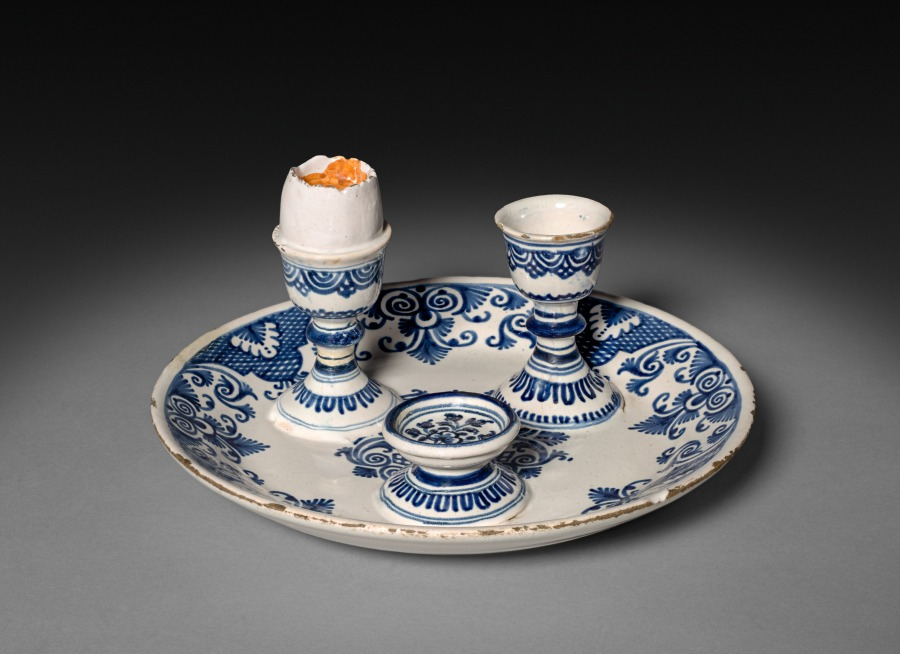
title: Plate with Boiled Egg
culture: France, 18th century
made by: possibly by Nevers Factory (French)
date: mid 1700s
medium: faience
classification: Ceramic